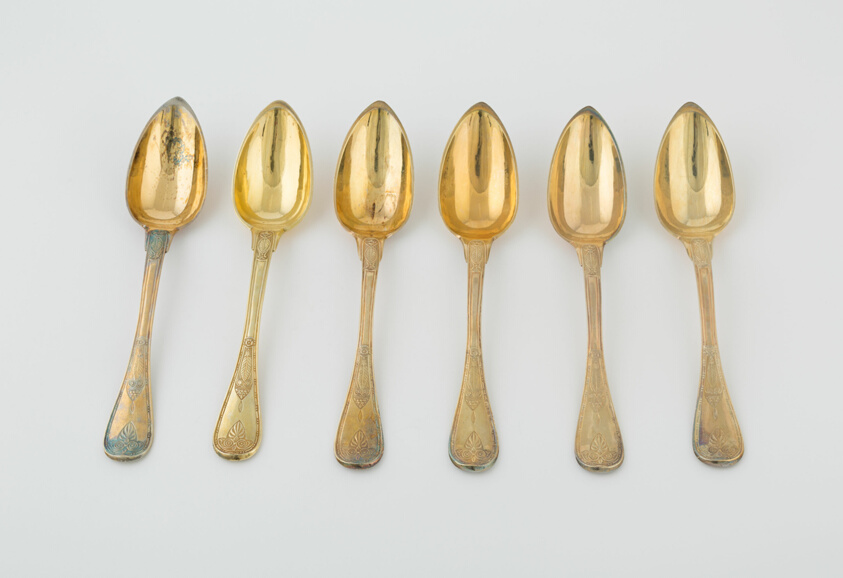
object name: Metalwork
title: Set of Tablespoons (14)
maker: Martin-Guillaume Biennais; French, 1764-1843; Pierre-Benoît Lorillon; French, 1757-1816; Paris, France; Pietro Paola Spagna; Italian, 1793-1861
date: 1789/1820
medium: Silver gilt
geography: Paris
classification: flatware; spoon; metalwork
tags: Borghese Service